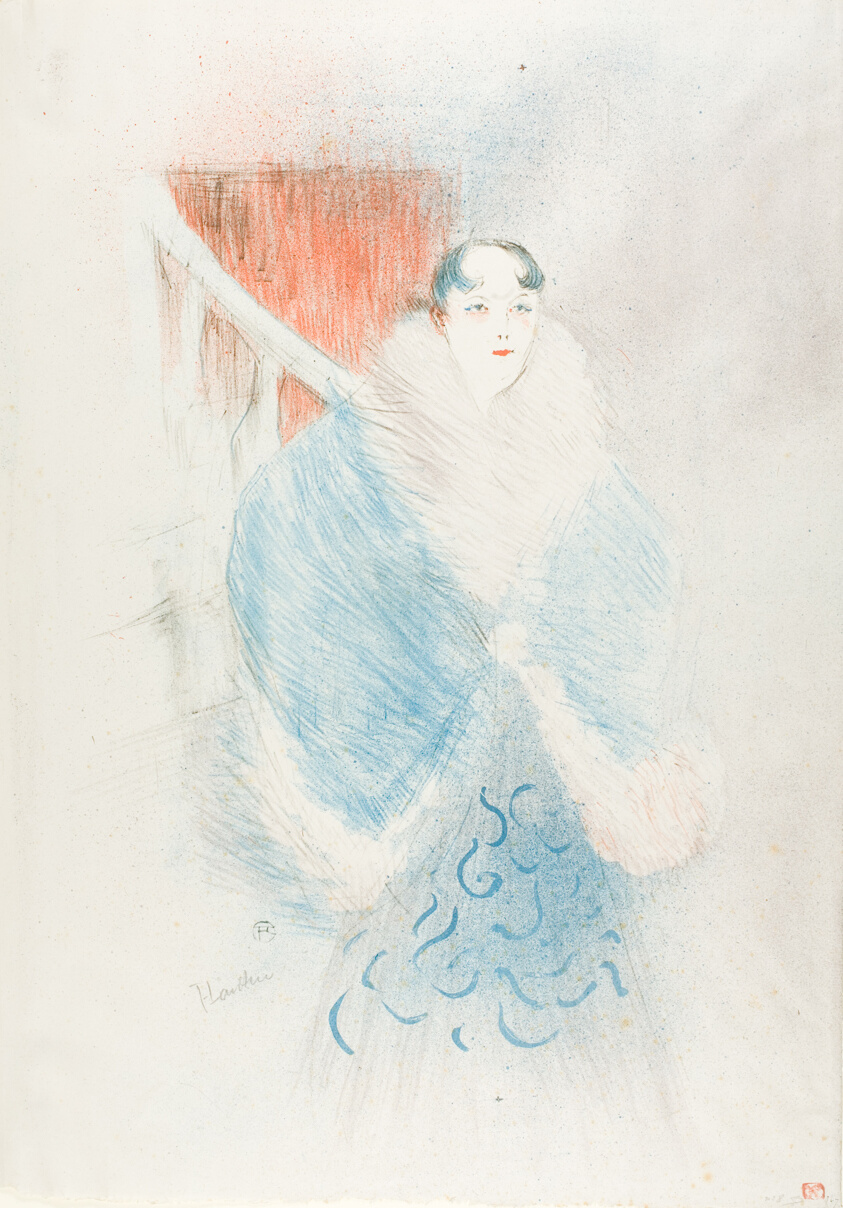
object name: Print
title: Elsa, called The Viennese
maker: Henri de Toulouse-Lautrec (French, 1864-1901)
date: 1897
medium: Color lithograph on grayish-ivory laid China paper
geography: France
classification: lithograph; print; prints and drawing